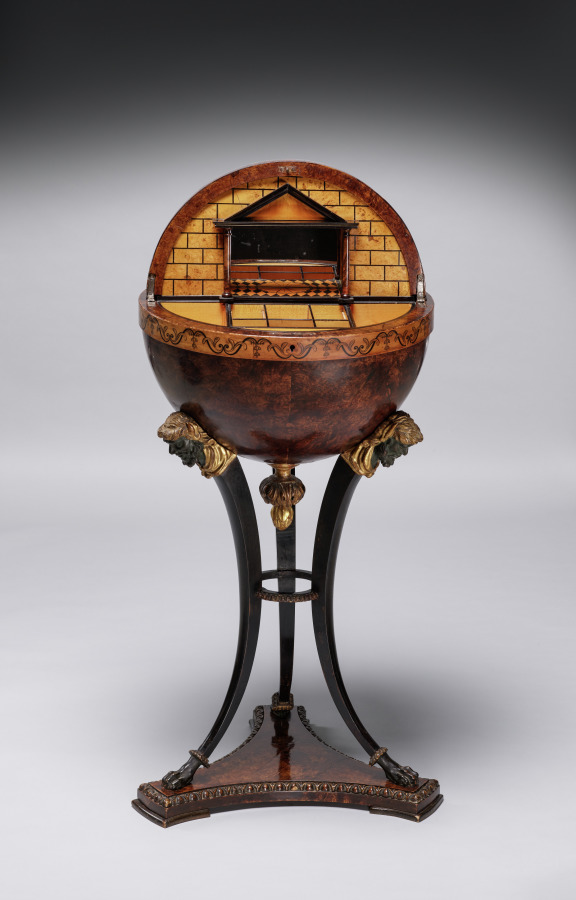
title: Globe Work Table (Globustisch)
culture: Austria, Vienna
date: c. 1810–15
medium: Burl walnut veneer, mahogany, ebony, satinwood, gilt wood, painted wood; mirrored glass; metal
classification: Furniture and woodwork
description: Work tables resembling globes were the usual form for a lady's sewing or writing table around 1800 in Austria. Combining moving parts, secret compartments, and highly finished decoration, these tables were also a way for the cabinetmaker to show off his skill. The tripod supports and temple-like architectural quality of both the exterior and interior decoration reflect the fashionable taste for neoclassical style, or Biedermeier as it was called in Austria, where Vienna was the center of such elaborate furniture production.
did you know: The top half of the globe rotates upward to reveal hidden compartments for sewing tools, threads, and unfinished fabric pieces.